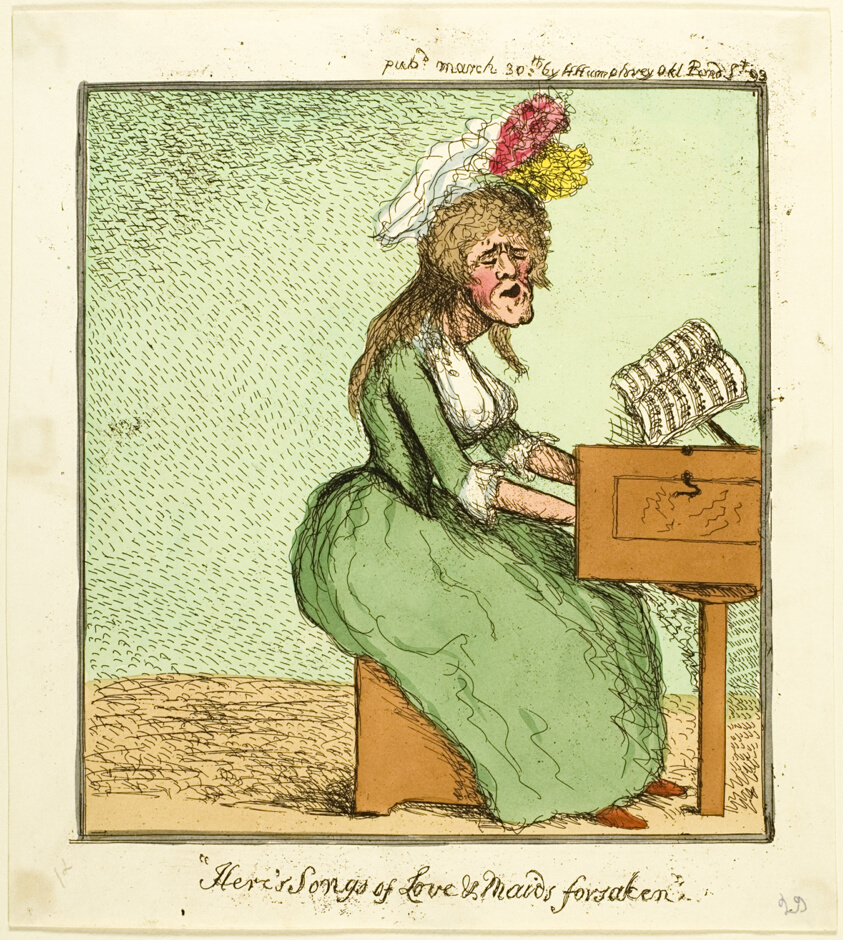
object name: Print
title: "Here's Songs of Love and Maids Forsaken"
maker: James Gillray (English, 1756-1815); published by Hannah Humphrey (English, c. 1745-1818)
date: published March 30, 1793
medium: Etching in dark brown, with handcoloring, on cream wove paper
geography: England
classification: etching; print; prints and drawing